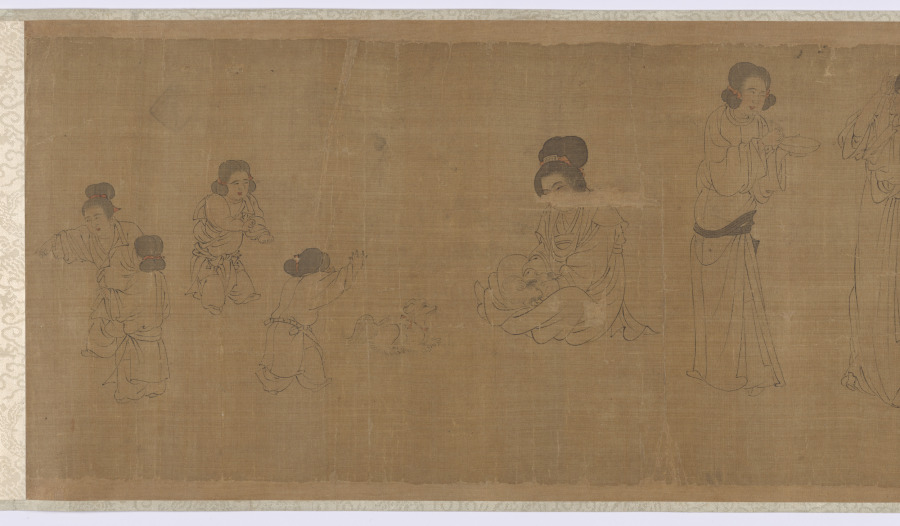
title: In the Palace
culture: China, Southern Song dynasty (1127-1279)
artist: after a work attributed to Zhou Wenju (Chinese, active 942–961)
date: before 1140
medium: Handscroll; ink and light color on silk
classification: Painting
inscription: 1 colophon and 13 seals: 1 colophon and 1 seal of Zheng Cheng 張澂 (d. 1143); 12 seals unidentified.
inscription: Colophon by Zhang Cheng 張澂 (d. 1143): 周文矩宮中圖婦人小兒其數八十，一男子寫神，而粧具、樂器、盆盂、扇椅席、鸚鵡、犬蝶不與。文矩句容人，為江南翰林待詔。作士女體近周昉，而加纖麗。嘗為後主畫南莊圖，號一時絕筆。它日上之朝廷，詔籍之祕閣。宮中圖云是真蹟，藏前太府卿朱載家。或摹以見餽。婦人高髻自唐以來如此。此卷豐肌長襦裙，周昉法也。予至嶠南，於端溪陳高祖之裔，見其世藏諸帝像，左右宮人梳髻與此畧同。而丫鬟乃作兩大鬟，垂 肩項間，雖醜而有真態。李氏自謂南唐，故衣冠多用唐制，然風流寔承六朝之餘。畫家者言辨古畫當先問衣冠車服，蓋謂是也。紹興庚申五月乙酉澹嵒居士題。 印：張澂印章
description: In the Palace depicts 13 ladies of the imperial household, three servants, and six children in fluent baimiao (plain drawing) brushwork, accentuated by color. The women entertain themselves by making music, tending children, and playing with pets. Their elaborate hairstyles, plump figures, and flowing robes are reminiscent of Tang dynasty fashion. The scroll illustrates elegant court life and is a direct copy of the original by Zhou Wenju (active 940–75) from Zhenjiang, Jiangsu province. Zhou was employed at the Southern Tang court in Nanjing under Emperor Li Yu (reigned 961–76), a prolific poet.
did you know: The ladies' elaborate hairstyles, plump figures, and flowing robes are reminiscent of Tang dynasty fashion.